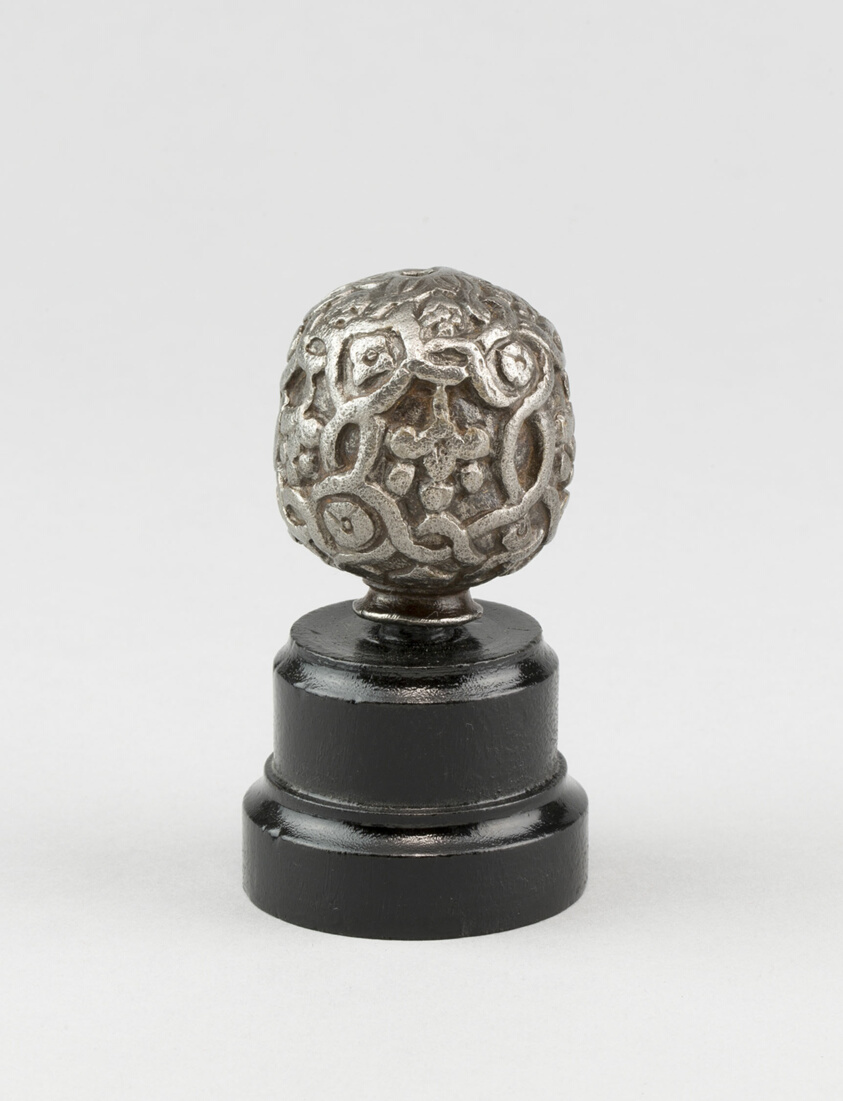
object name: Arms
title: Sword Pommel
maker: European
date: c. 1600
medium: Iron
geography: Europe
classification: edged weapon-sword; arms; arms and armor